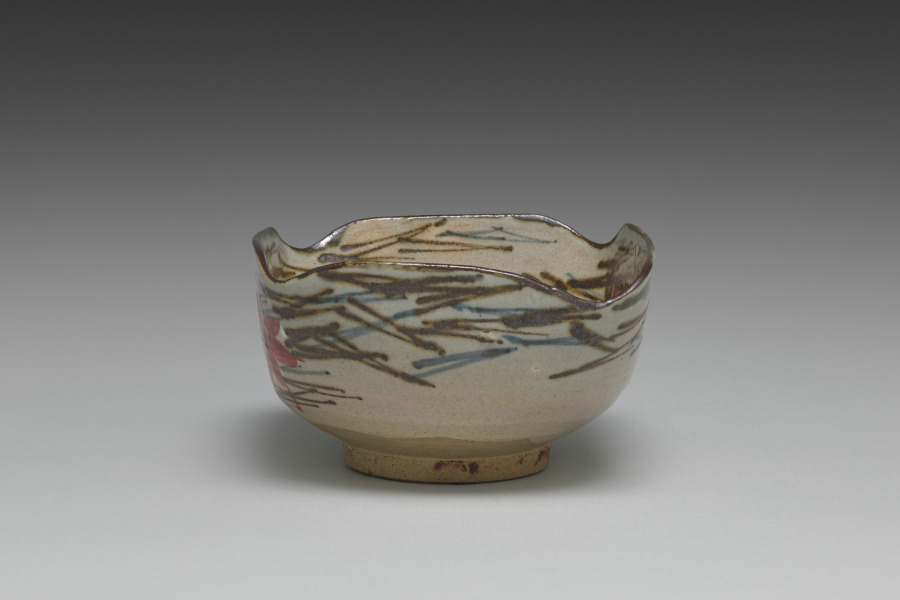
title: Nesting Dish with Scattered Pine Needles and Maple Leaves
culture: Japan, Edo period (1615–1868)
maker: Seifū Yohei I (Japanese, 1801–1861)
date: 1861–78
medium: One of a pair of side dishes; stoneware with underglaze blue and iron oxide, white slip, and overglaze color enamel (Kyoto ware)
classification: Ceramic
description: Seifū Yohei I made both blue and white porcelains after Ming dynasty (1368–1644) Chinese wares fired in the kilns at Jingdezhen for export. He also made colorful stoneware in the style of his teacher, Nin’ami Dōhachi (Takahashi Dōhachi II) (1783–1855).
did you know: The smaller dish is stamped with one of Yohei I’s seals.